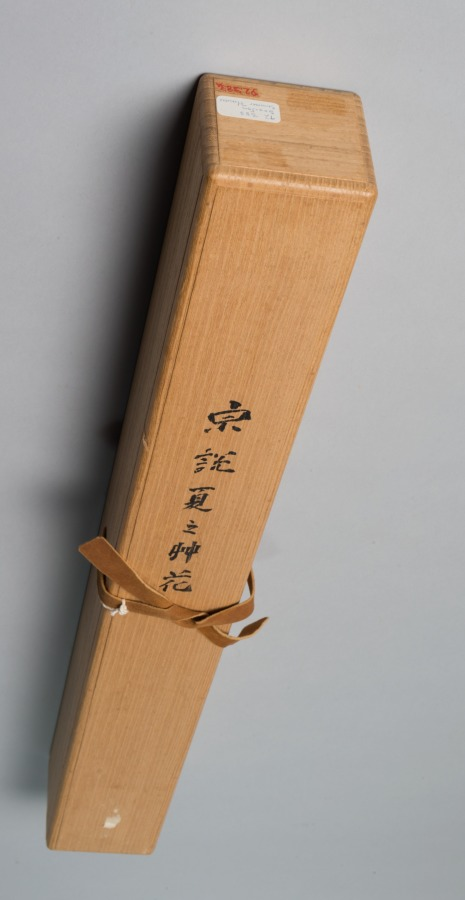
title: Summer Flowers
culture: Japan, Edo period (1615–1868)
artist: Kitagawa Sōsetsu (Japanese, active 1639–50)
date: mid-1600s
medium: hanging scroll; ink, color, and gold on paper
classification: Painting